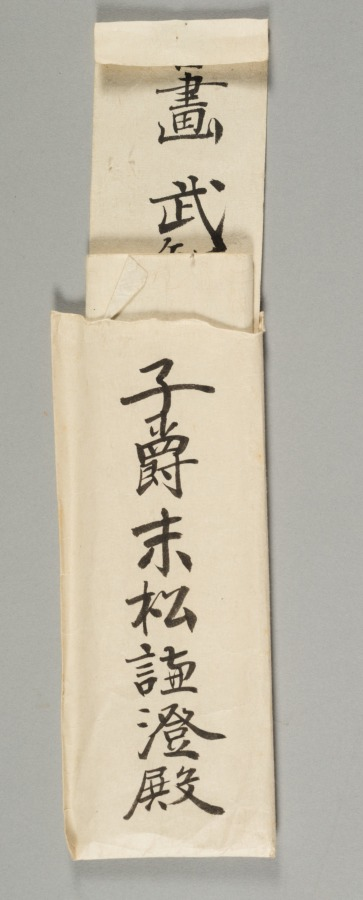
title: Fujiwara no Muchimaro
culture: Japan, Kamakura period (1185–1333)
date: 1200s or 1300s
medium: Hanging scroll; ink, color, gold, and cut gold on silk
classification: Painting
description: This portrait of Fujiwara no Muchimaro (680–737), a grandson of Fujiwara no Kamatari (614–669), includes an image of Buddha Dainichi Nyorai above his head. By situating the image of Dainichi there, this painting would seem to assert that Muchimaro is an avatar of Dainichi. In the same way that kami could be identified with Buddhist counterparts, powerful humans could also be seen as manifestations of Buddhist deities. A similar painting is at Eizanji in Nara, of which Muchimaro is known as the founder. It was once a branch temple of Kōfukuji, the Fujiwara family temple.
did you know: The boughs of wisteria appearing in the background symbolize the figure's status as a Fujiwara family member.